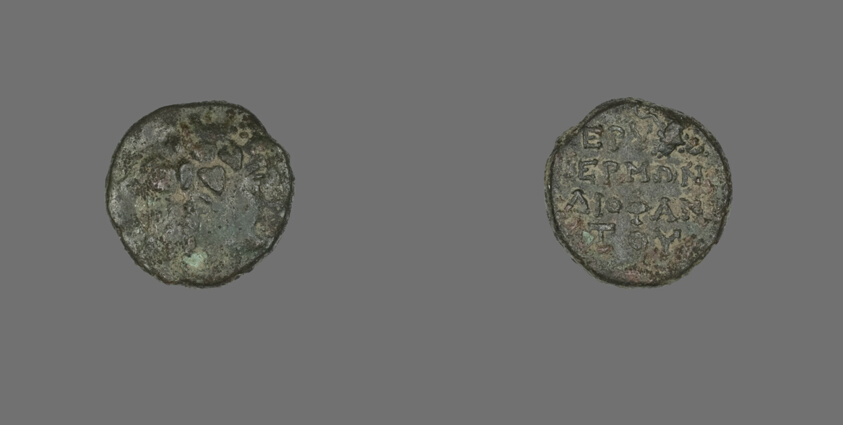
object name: Coin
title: Coin Depicting the God Dionysos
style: greek, ancient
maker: Greek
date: 300-200 BCE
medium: Bronze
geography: Ancient Greece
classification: coin; ancient art